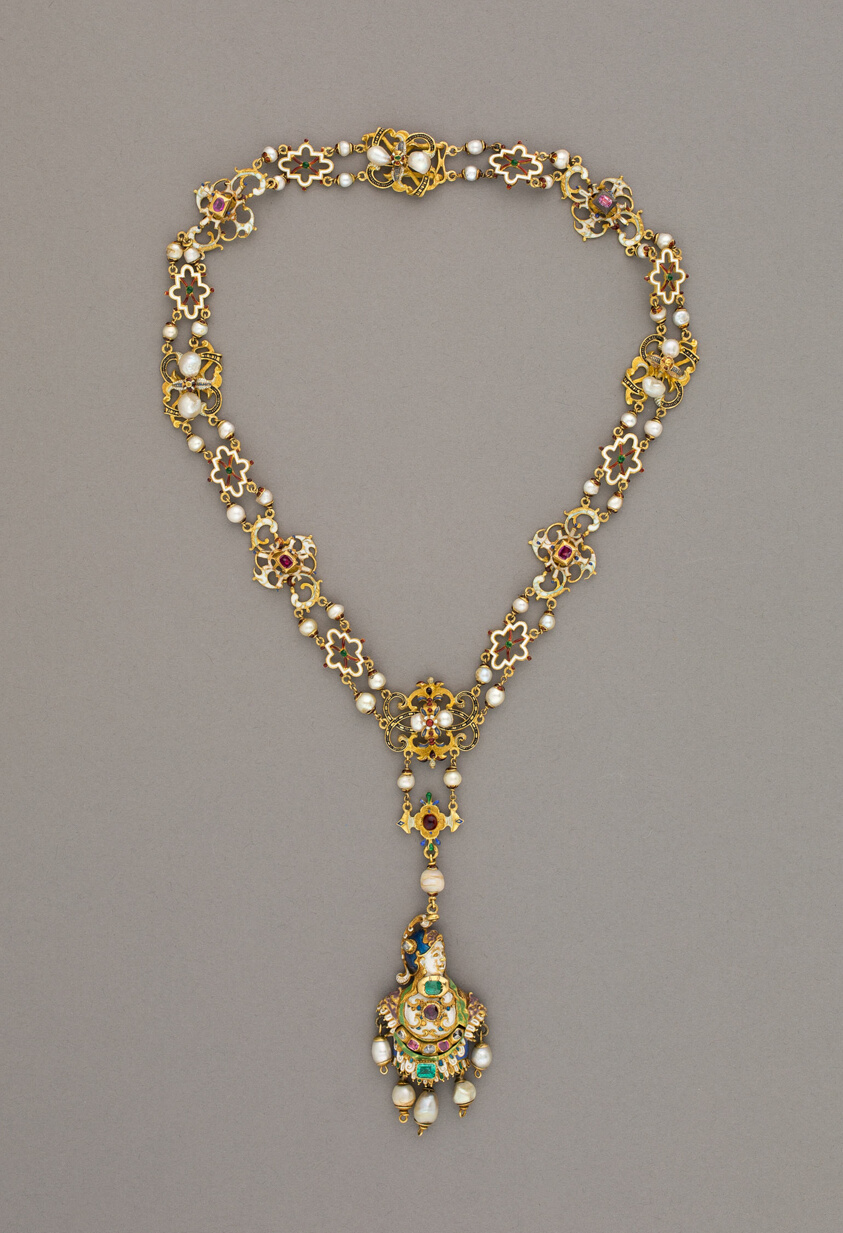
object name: Decorative Arts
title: Pendant Necklace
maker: European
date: c. 1600 and others 18th century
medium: Enameled gold, diamonds, rubies, and pearl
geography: Europe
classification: pendant (jewelry); jewelry; european decorative arts; decorative arts